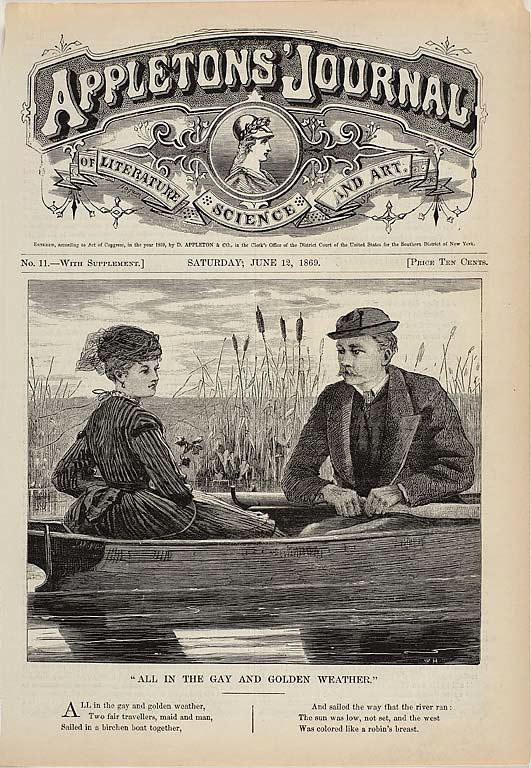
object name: Print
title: "All in the Gay and Golden Weather"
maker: Winslow Homer (American, 1836-1910); published by Appletons' Journal (American, 1869-1881)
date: published June 12, 1869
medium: Wood engraving on paper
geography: United States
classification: wood engraving; print; prints and drawing